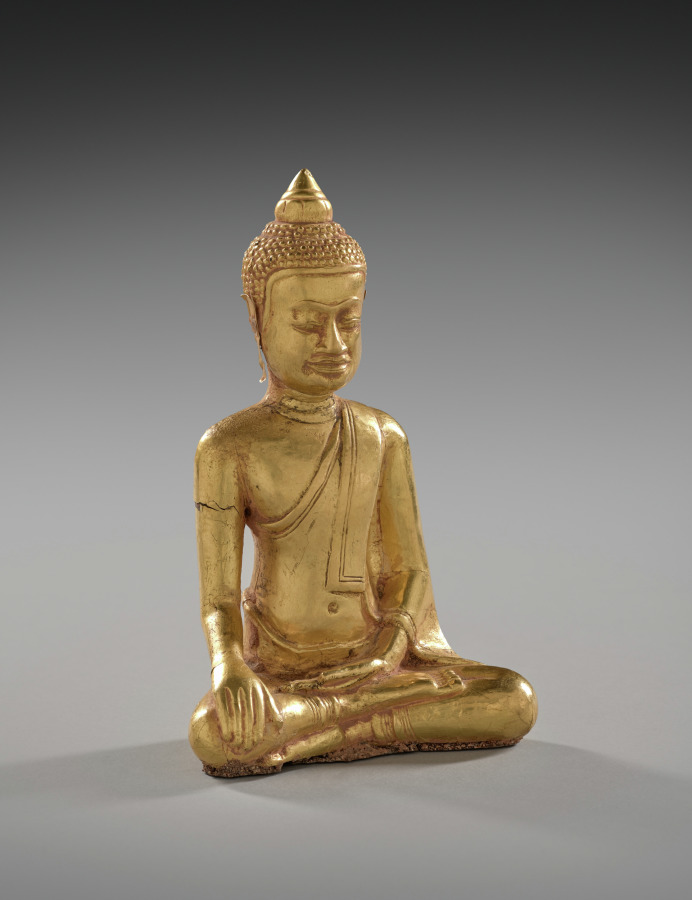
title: Seated Buddha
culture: Thailand, Ayutthaya, Wat Ratchaburana, 14th century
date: before 1424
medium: gold with resin core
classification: Sculpture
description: This pristinely modeled Buddha was fashioned from a sheet of 24-karat gold, using the repoussé (hammering) technique. The figure is filled inside with a resin core. The style is typical of the last phase of Khmer art (800s–1400s), the Lapburi style, which combines characteristics of both Cambodian and Thai sculptural styles.